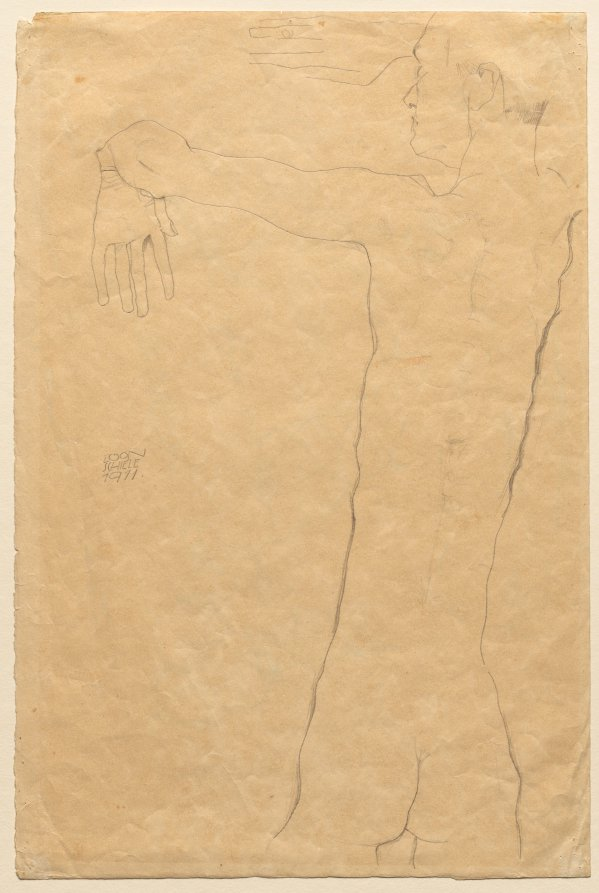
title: Nude Man with Raised Arms (recto)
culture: Austria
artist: Egon Schiele (Austrian, 1890–1918)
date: 1911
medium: graphite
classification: Drawing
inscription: signed, left center, in graphite: EGON / SCHIELE / 1911.